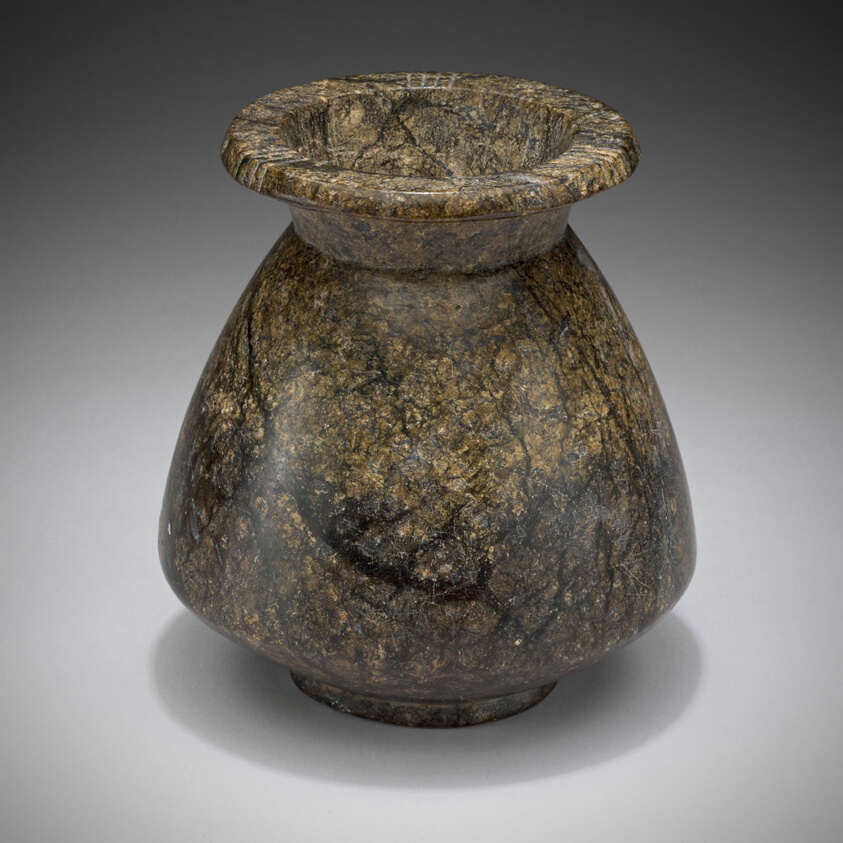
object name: Vessel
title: Ointment Vessel with Lid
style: egyptian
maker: Egyptian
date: New Kingdom, Dynasty 18 (about 1550–1295 BCE)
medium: Serpentinite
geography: Egypt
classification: personal grooming / hygiene / cosmetic container; stone; vessel; ancient art